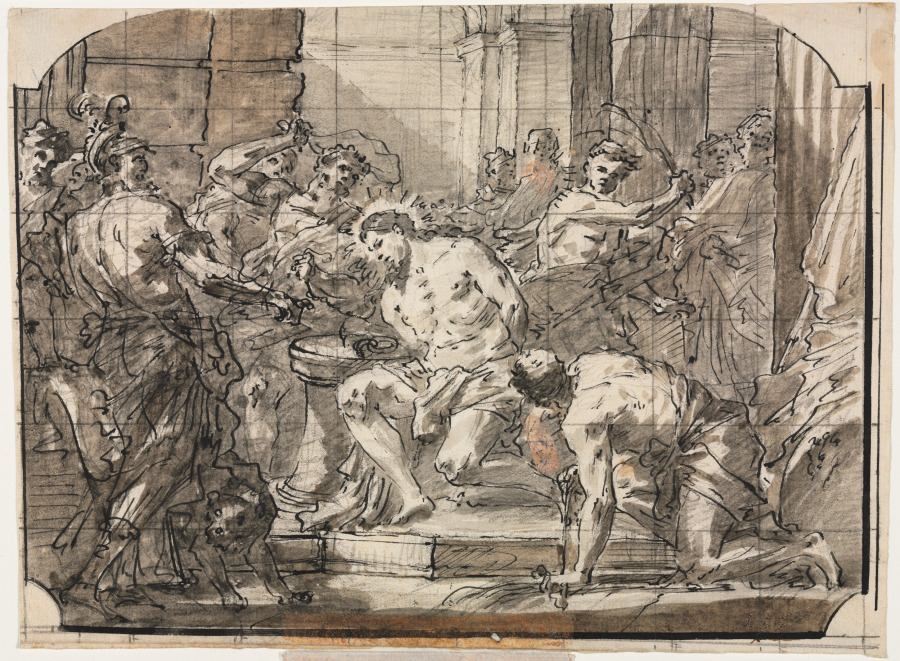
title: Flagellation of Christ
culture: Italy, 18th century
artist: Gaspare Diziani (Italian, 1689–1767)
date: c. 1750–55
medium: pen and black ink, black chalk, and brush and gray wash, with brush and brown wash; squared in graphite; framing lines in black chalk and pen and black ink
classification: Drawing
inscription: VERSO, upper right, in graphite: SIX [L?]E [sideways]